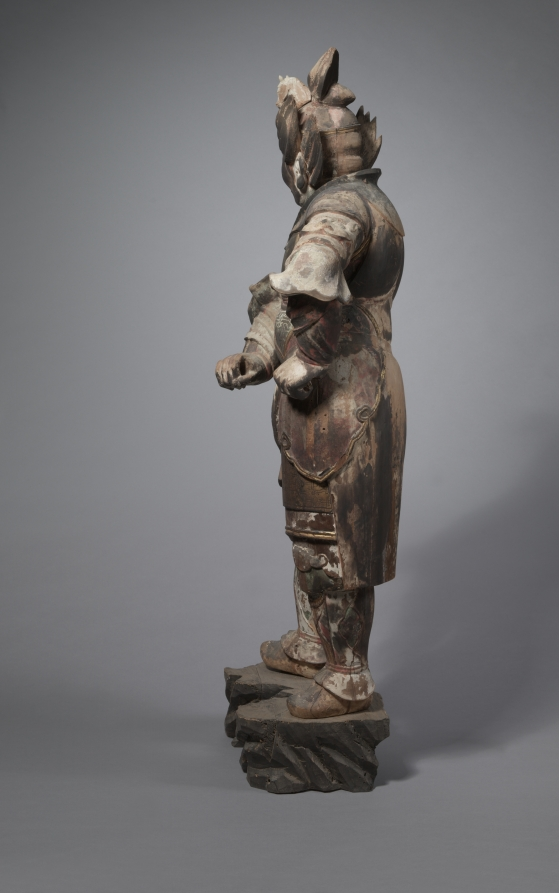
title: A Heavenly General (One of the Junishinshō)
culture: Japan, Kamakura period (1185–1333)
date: 1200s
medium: Wood with lacquer, color, gold, and crystal eyes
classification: Sculpture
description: This dynamic figure was originally part of a set of Twelve Divine Generals (Junishinshō) that stood in a Japanese Buddhist temple hall, protecting the central icon of Yakushi Nyorai, the Healing Buddha. This sculpture was constructed from many pieces of thinly carved wood joined together with pins, then covered with hemp cloth and lacquer paste, and finally decorated with pigments. Eyes made of crystal, with painted details, finish the composition. The proliferation of religious sites throughout Japan in the 1200s, particularly in Kyoto, kept sculptors’ studios busy creating religious icons.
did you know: A fierce facial expression warns us not to cross this protective deity.